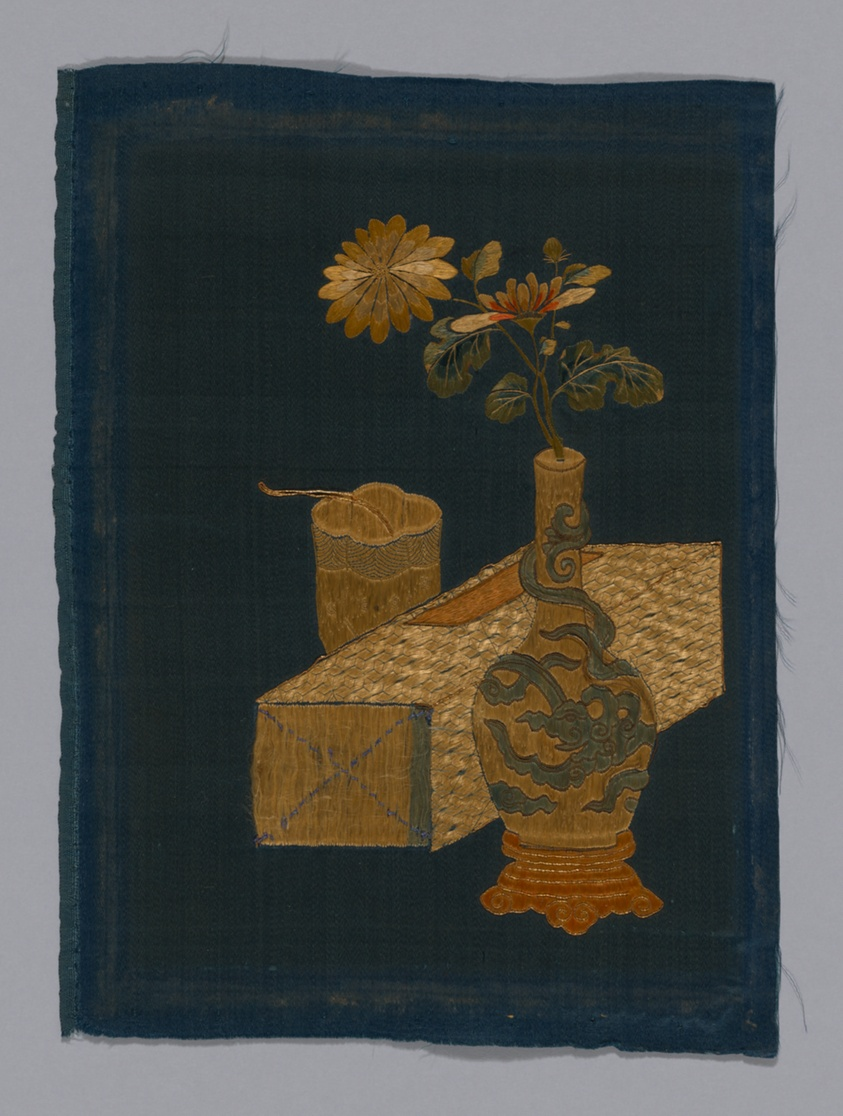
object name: Textile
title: Panel piece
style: kangxi, qing, East Asian, Chinese (culture or style), asian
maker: China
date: Qing dynasty (1644–1911), 1800/50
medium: Satin, with couched cord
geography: China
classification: textile; weaving